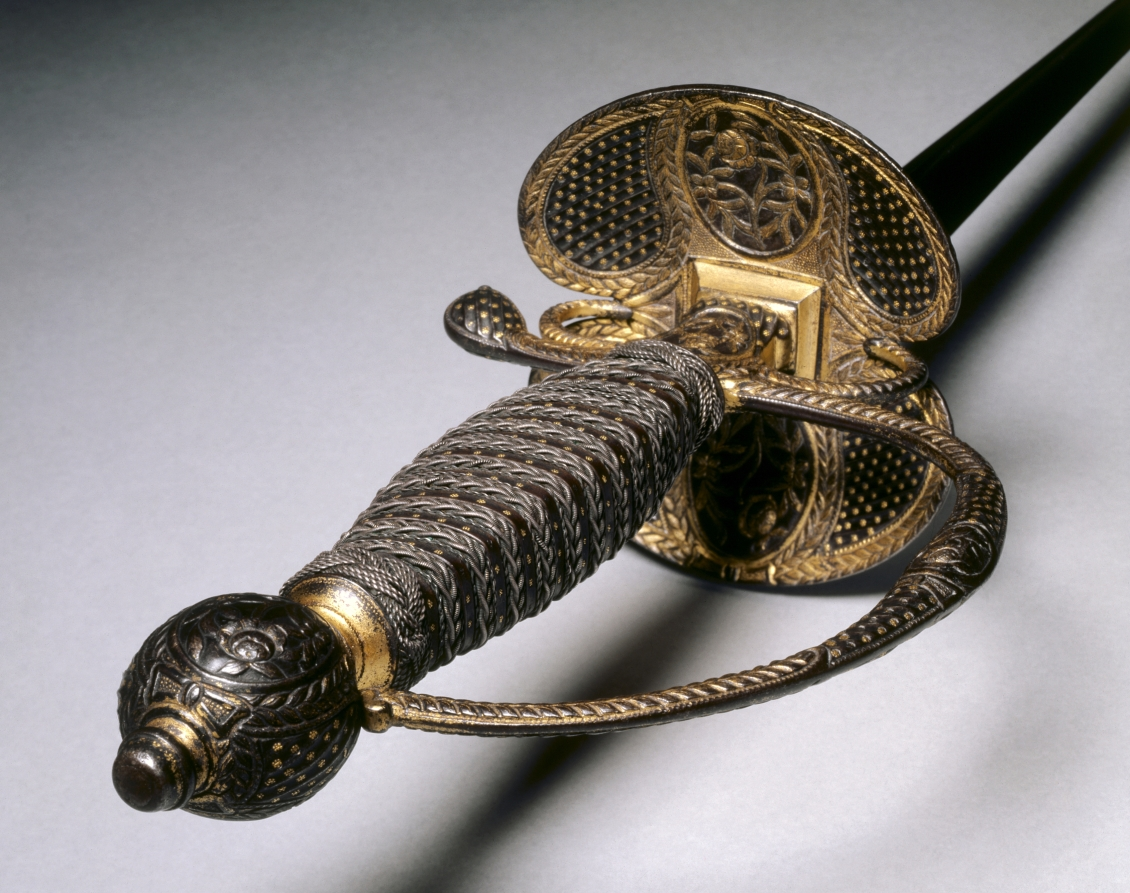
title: Small Sword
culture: France, Paris (?), 18th century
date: c. 1780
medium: forged steel blade; partially gilt and russet steel hilt; steel wire, leather bands, wood core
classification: Arms and Armor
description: During the 1700s, the small-sword emerged as a light, quick weapon. Like the rapier it was carried by unarmored civilians, the noblemen of the upper classes. Over time this delicate sword became more an accessory of male attire than a weapon essential to life and death. The sword hilt, which shows even when the blade is sheathed, became the ground for elaborate decoration. These small-swords thus represent the final stage in the evolution of the sword, from the edged weapons of antiquity to the elegantly refined blades of the 1700s and 1800s.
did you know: The fashion among gentleman for wearing small-swords with everyday attire began to wane by the end of the 1700s with the exception of the military dress sword.